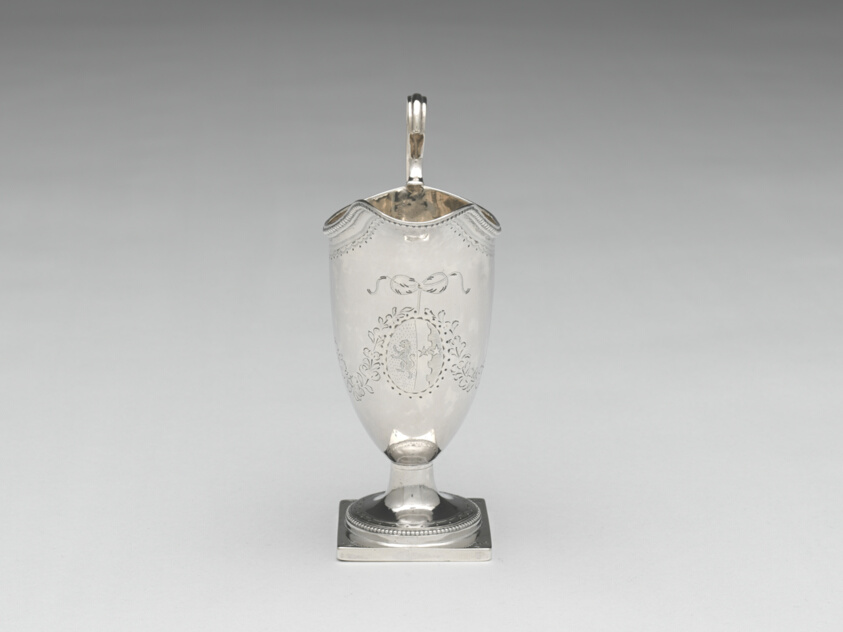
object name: Metalwork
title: Milk Pot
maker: Paul Revere Jr.; American, 1734–1818; Boston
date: 1784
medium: Silver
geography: Boston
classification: creamer; silver; american decorative arts; american arts; decorative arts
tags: dining, drinking